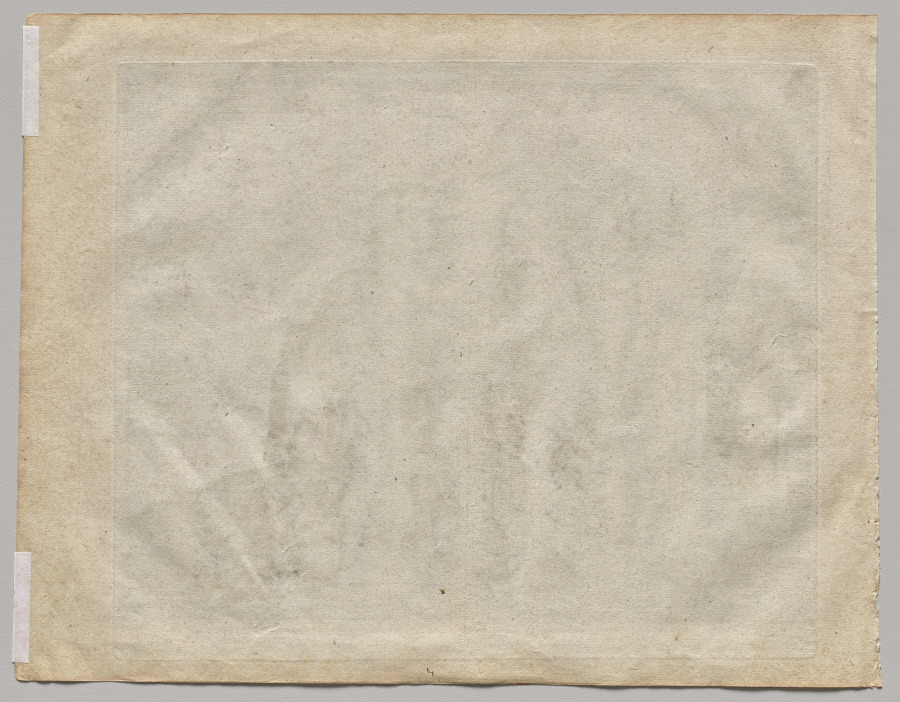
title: The Seed finding Good Earth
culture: Netherlands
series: Parable of the Sower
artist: Philip Galle (Flemish, 1537–1612)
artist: after Gerard van Groeningen (Flemish)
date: 1574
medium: engraving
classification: Print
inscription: Watermark not identified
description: This is one of a series of four prints portraying the biblical parable of the sower, made in Antwerp (in present-day Belgium) at the end of the 1500s. The parable compares types of soil to people in the world: one hardened; one fickle; one distracted by things of the world; and one with an open heart, ready to accept God. The last sower, depicted here, presents fertile soil for his seed resulting in the bountiful harvest seen in the background. He is accompanied by figures representing theological virtues Faith, Hope, and Charity.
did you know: The sower’s prosperity due to his fertile land and heart is represented by his act of charity, providing money to a passing beggar.